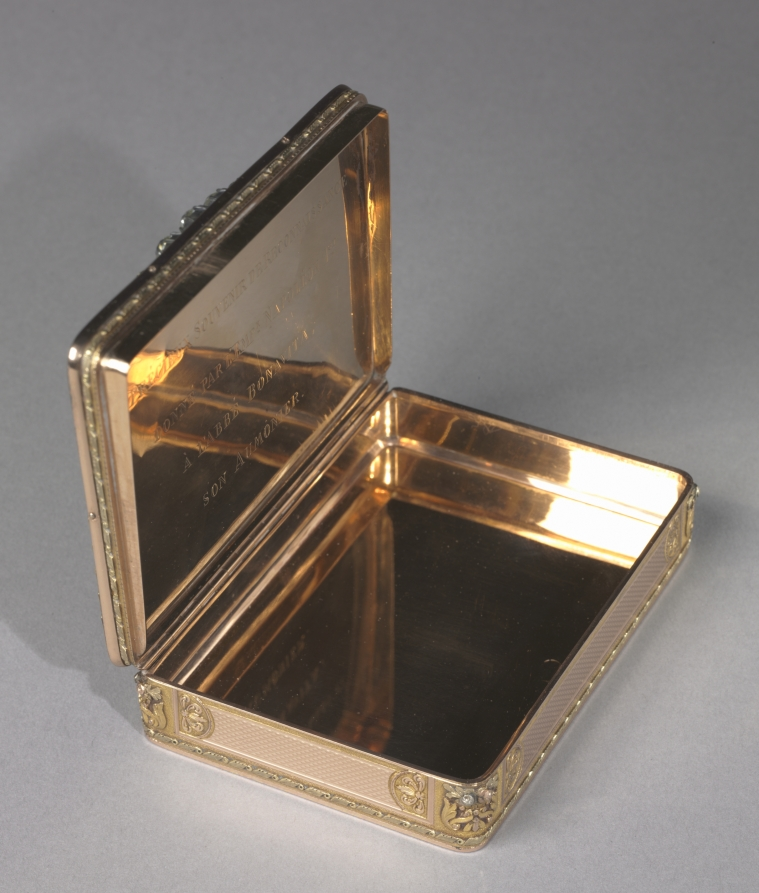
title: Portrait of Napoleon I, Emperor of the French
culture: Box: Switzerland; miniature: France, 19th century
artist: Jean-Baptiste Isabey (French, 1767–1855)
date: 1810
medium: watercolor on ivory in a Swiss gold box with diamonds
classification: Miscellaneous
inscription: inscribed inside cover: "Précieux souvenir de reconnaissance donné par l'Empr. Napoléon 1er à L'Abbé Bonavita, son Aumônier."